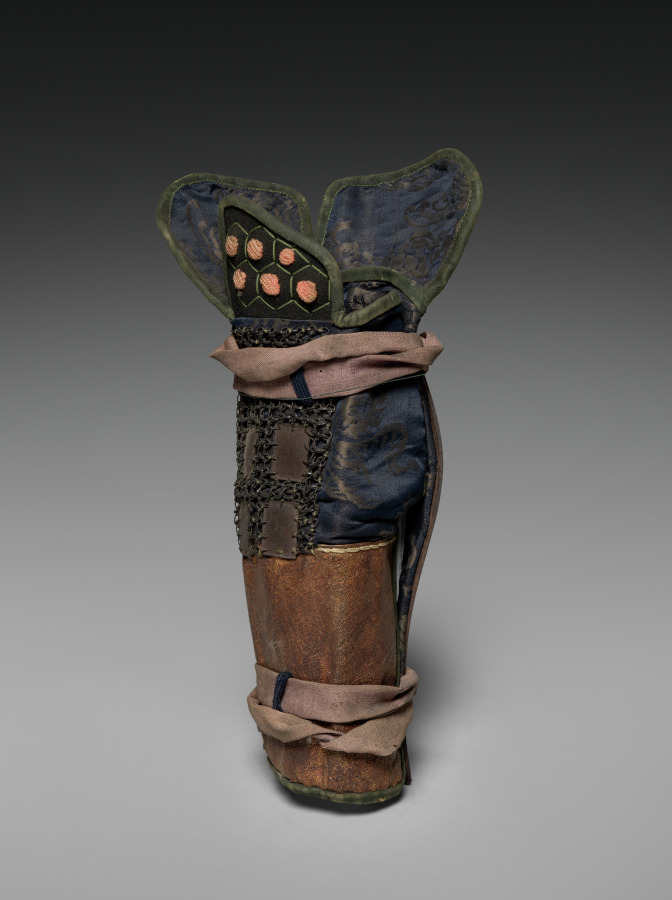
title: Shin Guard (Sune-ate)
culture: Japan, Edo period (1615–1868)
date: 1600s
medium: Iron, lacquer, textile (silk)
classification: Arms and Armor